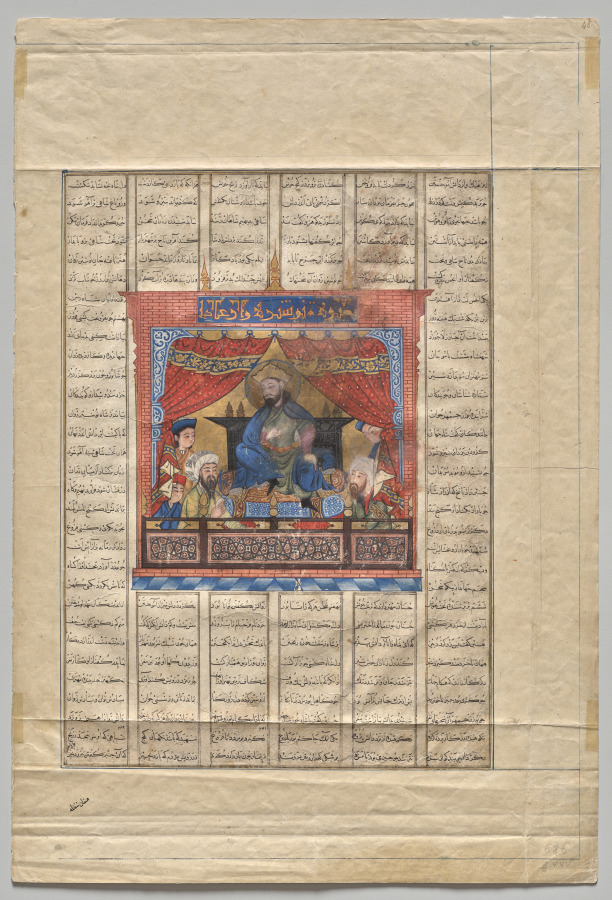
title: Portrait of Nushirwan the Just (verso) from a Shahnama (Book of Kings) of Firdausi (940–1019 or 1025)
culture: Iran, Tabriz, Ilkhanid period (1256-1353)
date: 1330–35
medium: opaque watercolor, ink, and gold on paper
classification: Manuscript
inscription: Script: Naskh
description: Mongol interest in the production of illustrated manuscripts eventually focused on Persian epic poetry. The Shahnama, a compilation of the epics and tales of Iran's legendary heroes, was a natural choice; the book included many subjects that suited Mongol taste, such as banquets, battles, hunting, and magical or fantastic events. Seated on the throne in the center of the painting is the Sasanian ruler of Iran, Khusraw I Anushirwan (531–579), descendant of Bahram Gur. Above the king's head an inscription reads, "Picture of Nushirwan the Just." The figure in the elaborate turban to the left of the king is probably the young Minister Buzurgmihr, famous for his wisdom and virtue. To celebrate the explanation of a troublesome dream by Buzurgmihr, Nushirwan held a series of seven banquets. The text around this painting describes the fifth banquet.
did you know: The symmetrical composition conveys the stability, balance, and restraint during the reign of King Nushirwan the Just.